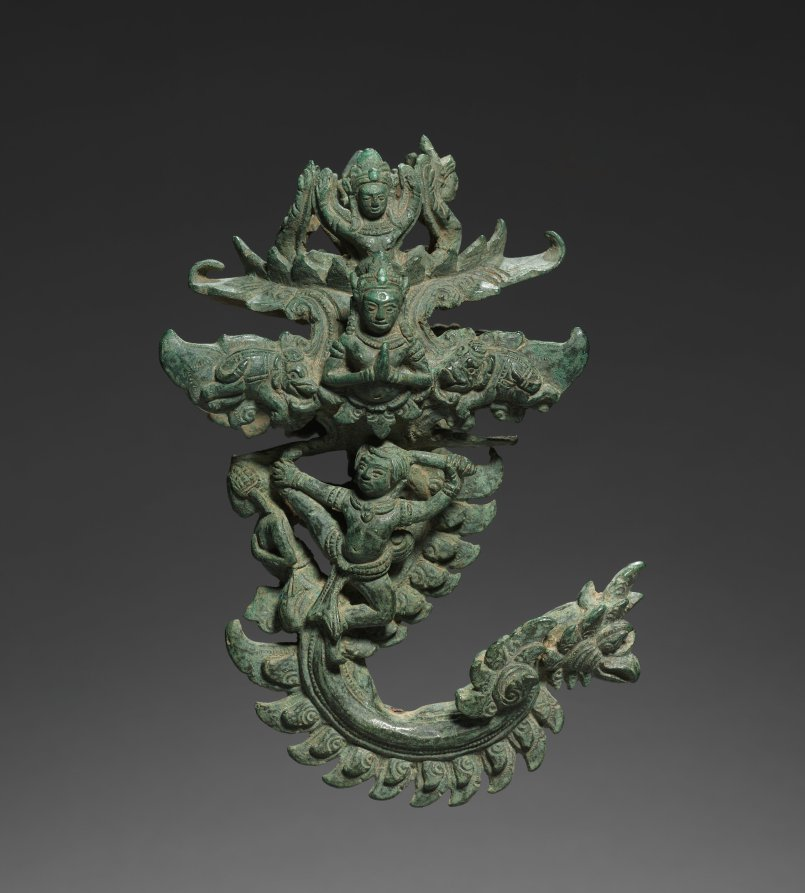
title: Palanquin Hook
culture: Cambodia, probably Angkor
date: 1175–1230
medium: bronze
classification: Sculpture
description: When members of the royal family or priesthood traveled in a public festival procession or to a temple to make offerings or participate in a ceremony, they would be carried in a palanquin, or a covered litter. Portable objects of veneration, such as bronze images or a sacred fire, were also carried on palanquins. The palanquins had wooden poles, hanging seats or raised platforms, and bronze fittings cast in intricate forms and gilt, lending the palanquins a sumptuous quality. This hook once supported a bronze ring from which hung a seat, like a hammock or swing. A wooden pole would have passed through the hollow socket at the top and was carried on the shoulders of bearers. The hook segment ends in the face of a garuda, a man-eagle with a prominent beak, stylized wings, and feathers. Figures indicative of devotion and success, including pairs of elephants, crown the fitting.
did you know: In the middle of the hook, a figure holding a sword in one hand and his extended leg in the other is in a dance pose expressing vigorous attack.